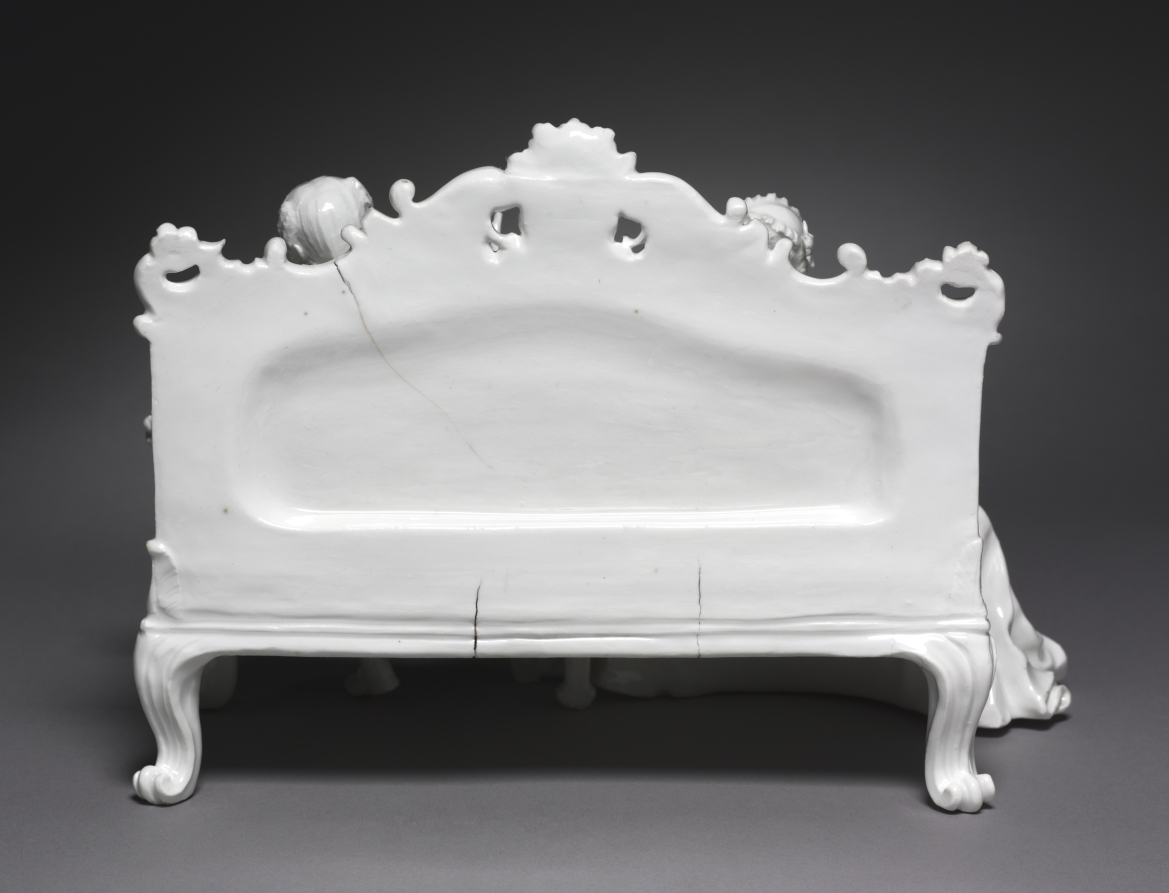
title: Figural Group: Musicians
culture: Germany, 18th century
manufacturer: Meissen Porcelain Factory (German, est. c. 1710)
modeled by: Johann Joachim Kändler (German, 1706–1768)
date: c. 1737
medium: porcelain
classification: Ceramic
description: An elegantly dressed couple accompany one another in a duet while seated on a tall-backed settee in this German porcelain figurine. The woman is likely playing a lute, an early form of the guitar, while the gentleman joins in with a wooden flute. Their music-making reflects their courtship and intimacy—a typical symbolic gesture rendered in such figural ceramic sculptures.